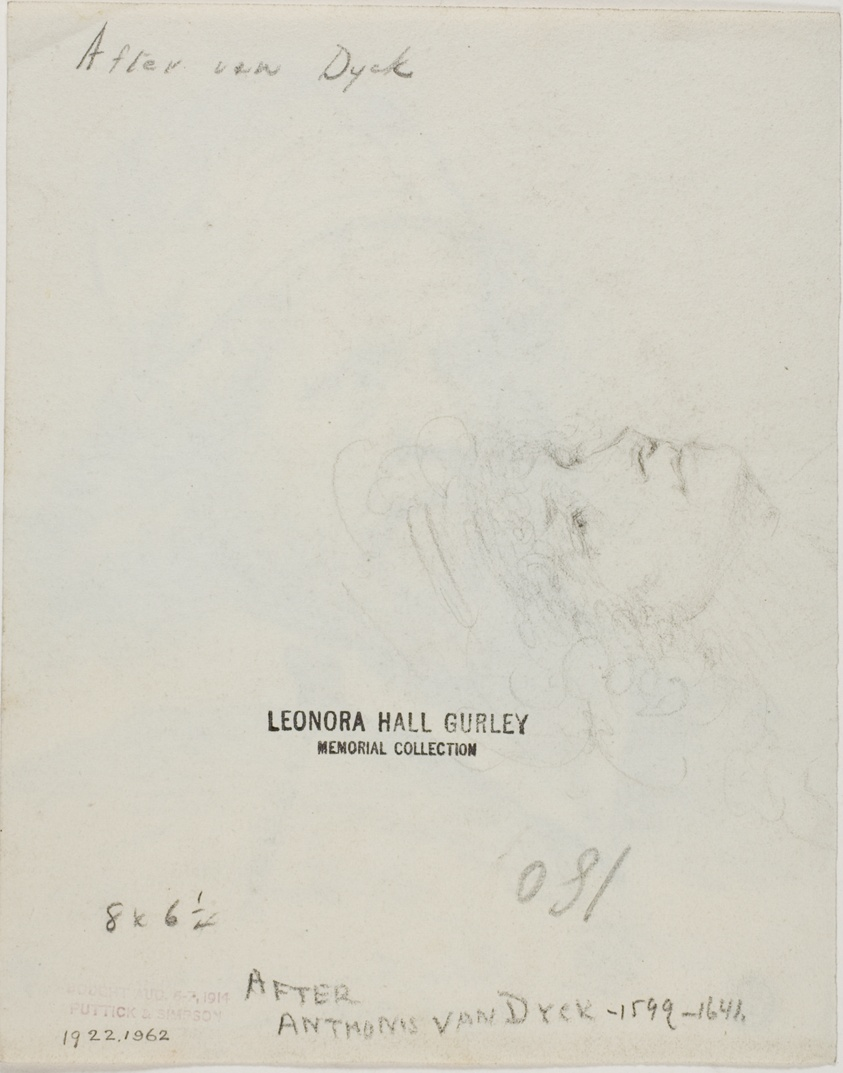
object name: Drawing and Watercolor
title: Inigo Jones (recto); Sketch of Female Head (verso)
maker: After Anthony van Dyck; Flemish, 1599-1641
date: c. 1790 (recto; n.d. (verso)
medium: Black chalk, with brush and pale brown wash (recto), and charcoal (verso), on ivory wove paper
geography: Flanders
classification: chalk; drawings (visual works); prints and drawing